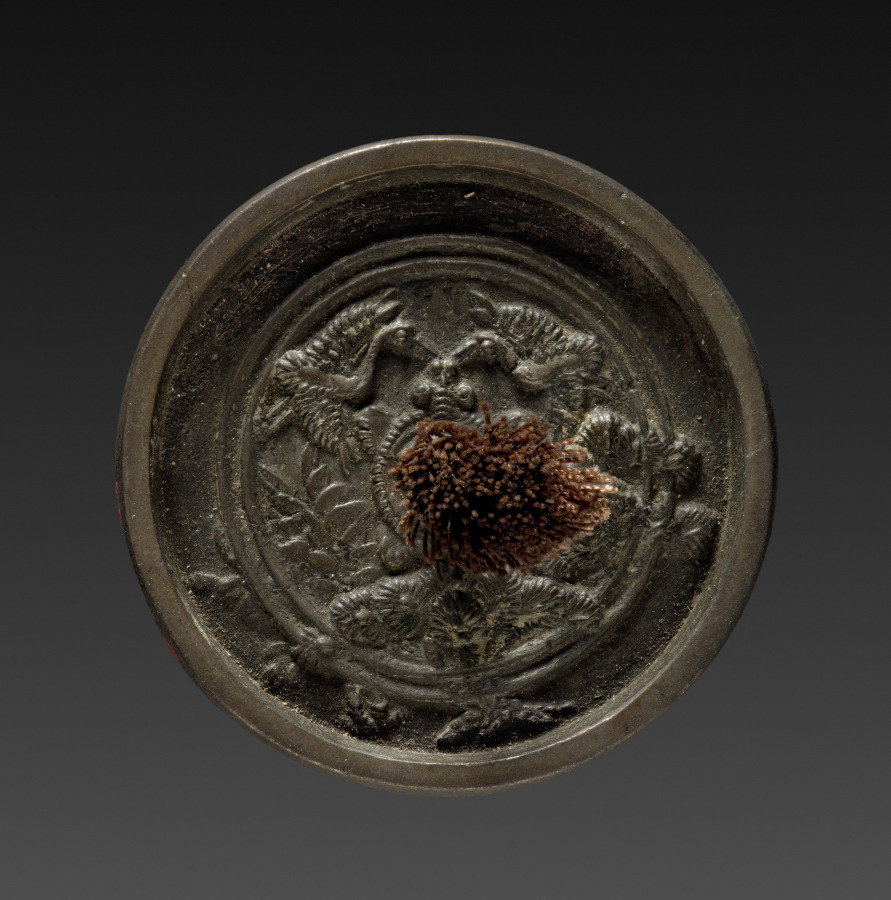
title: Mirror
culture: Japan, Edo period (1615–1868)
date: 1615–1868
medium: bronze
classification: Metalwork